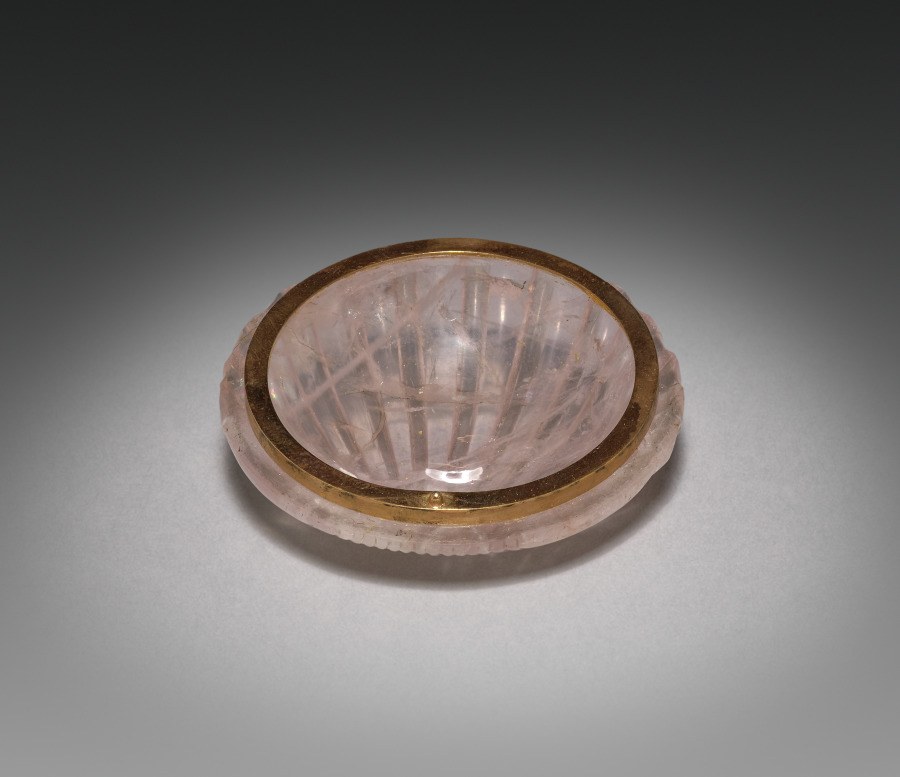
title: Shell-Shaped Box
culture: Italy (?), 19th century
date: late 1800s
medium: pink quartz, gold, enamel, diamonds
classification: Stone